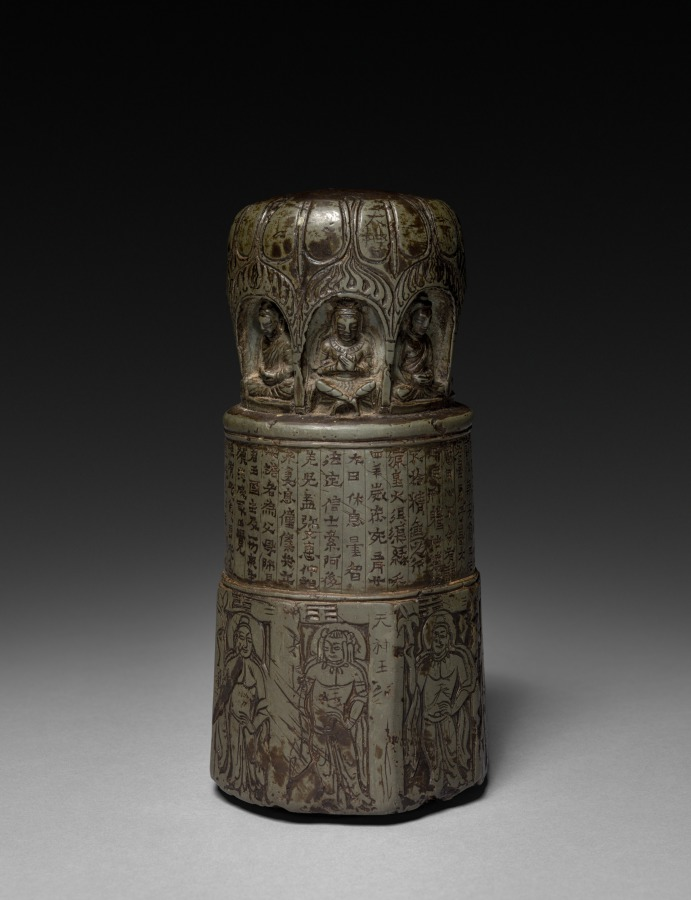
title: Miniature Votive Stupa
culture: China, Gansu province, Northern Wei dynasty (386-534)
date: 435 CE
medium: steatite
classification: Sculpture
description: This sutra pillar, inscribed with a sacred Buddhist text, belongs to a group of miniature stupas (jingta) that were found exclusively in the Gansu corridor, Northwest China. Ranging in date between AD 426–36, some of them bear the names of the lay Buddhist donors who commissioned them. A stupa is an architectural round structure built for the veneration of Buddhist relics. Miniature stupas may have commemorated the visit of a sacred site or represented donations to religious communities and sites.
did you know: There are trigrams, three horizontal lines, broken or continuous, above each of the eight bodhisattvas in the stupa's lower section.